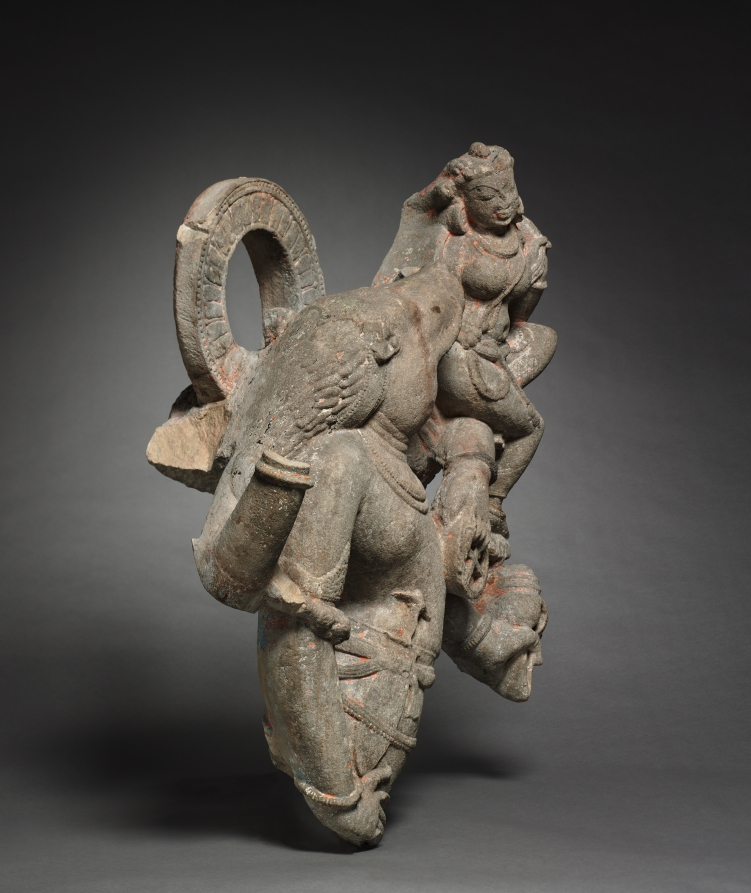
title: Varaha, Boar Incarnation of Vishnu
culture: Central India, probably Madhya Pradesh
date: 700–800s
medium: sandstone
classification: Stone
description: The Hindu god Vishnu took the form of a boar to rescue his wife Bhu (Earth in Sanskrit) from the bottom of the primordial ocean, where she had been hidden by a demon. Here shown with the head of a boar and the powerful lunging body of a warrior, Varaha holds out one of his four elbows as a seat for the earth goddess who he has rescued.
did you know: In his two left hands, he hold the conch and discus.